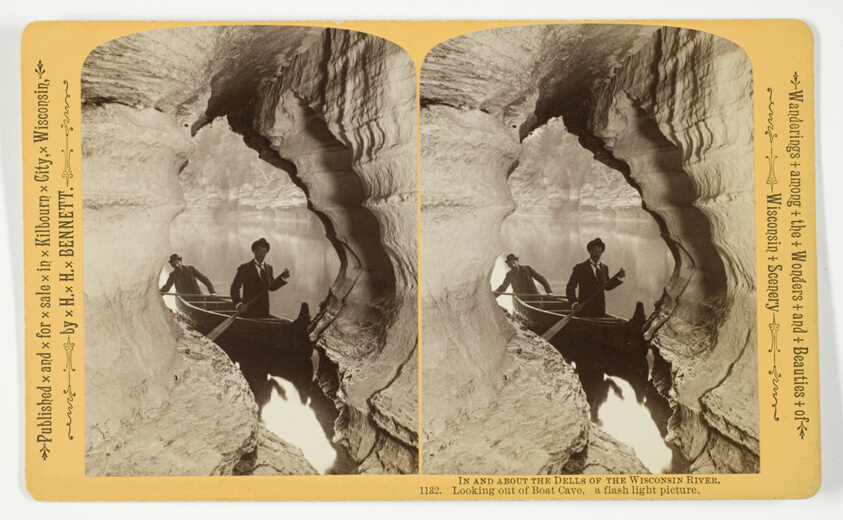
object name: Photograph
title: Looking out of Boat Cave, a flash light picture, No. 1132 from the series "In and About the Dells of the Wisconsin River"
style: 19th century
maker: Henry Hamilton Bennett (American, born Canada, 1843-1908)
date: 1870/1908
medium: Albumen print, stereo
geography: Wisconsin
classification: photography; photograph; albumen silver print; stereograph (albumen)